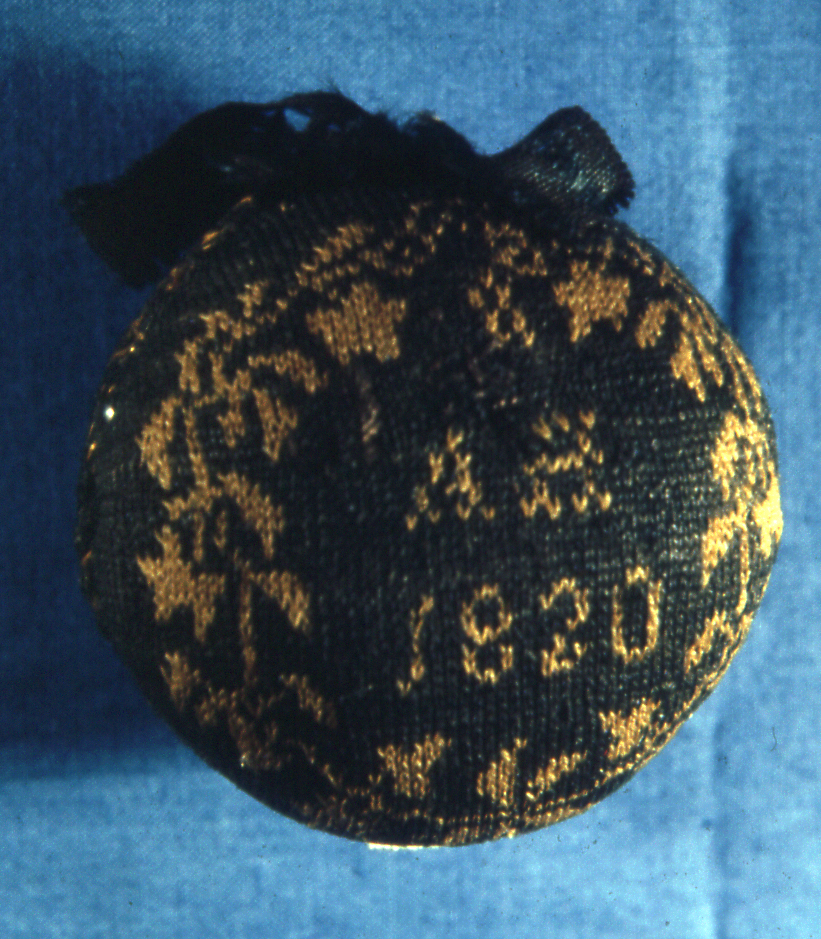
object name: Textile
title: Pinchushion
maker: United States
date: 1820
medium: Cover: wool, plain knitting; ribbon: silk, plain weave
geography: United States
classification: pincushions; sewing tools; textile working equipment; textile